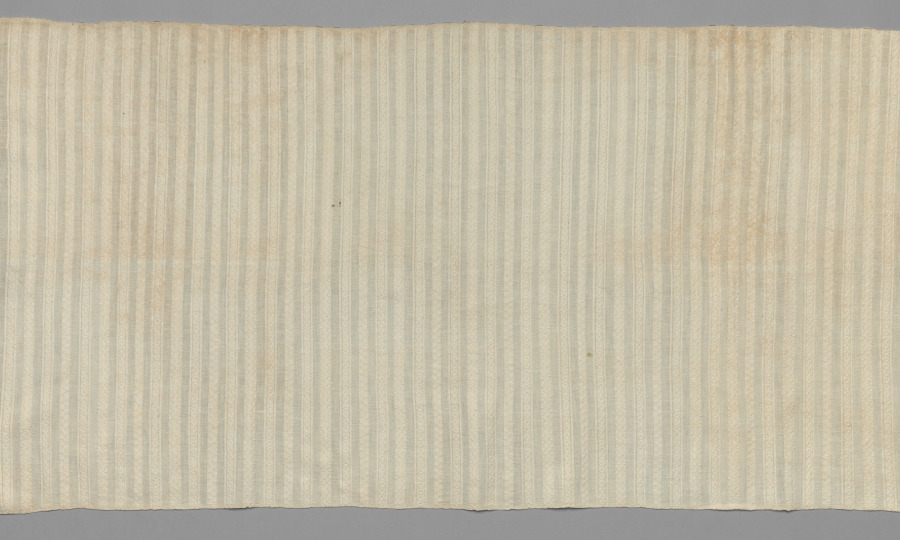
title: Towel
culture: Spain(?)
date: 1900–1920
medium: Plain weave and weft brocaded linen: crochet and embroidery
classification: Textile